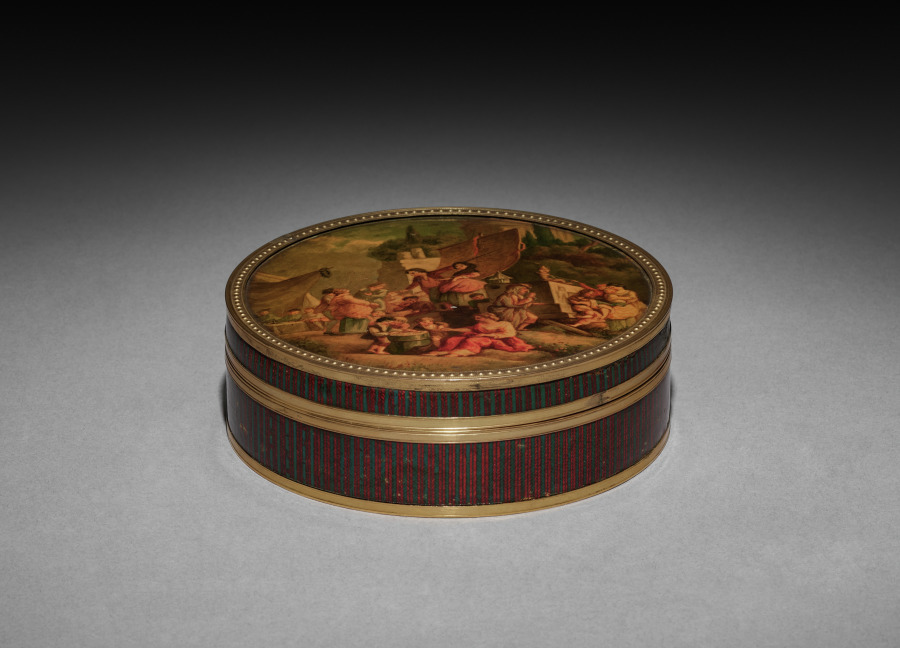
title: Snuff Box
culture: France, 18th century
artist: after François Boucher (French, 1703–1770)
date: 1780–1800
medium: gold or gilt metal mounts; cover with Vernis Martin style decoration; sides and bottom enamel over gilt engine turned design; interior lined in tortoiseshell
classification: Miscellaneous